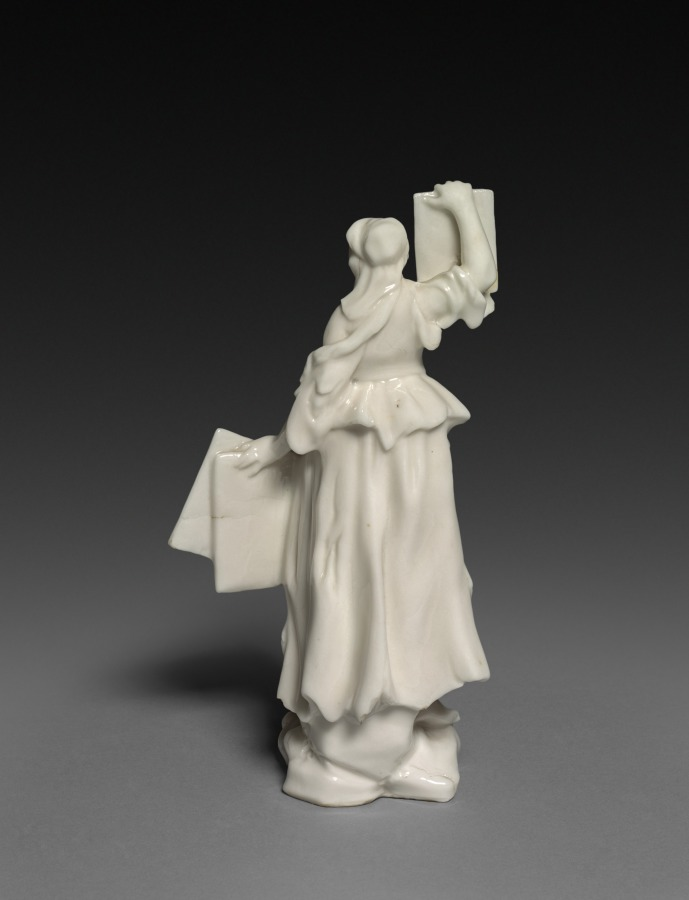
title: Print Seller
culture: Italy, Naples, Capo di Monte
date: c. 1750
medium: porcelain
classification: Ceramic